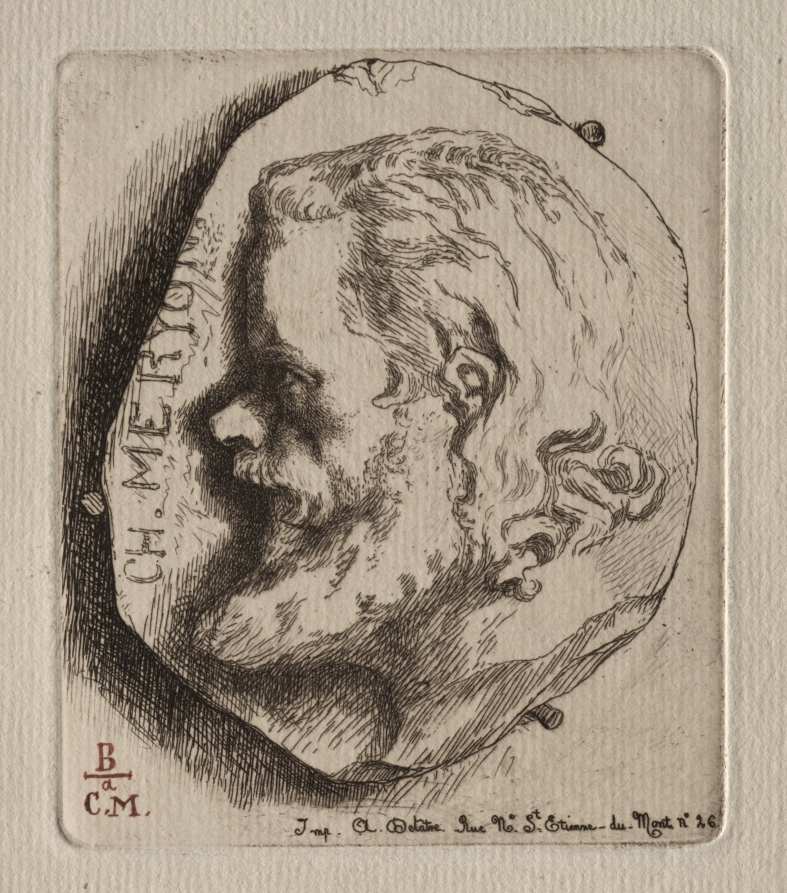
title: Charles Meryon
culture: France, 19th century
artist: Félix Bracquemond (French, 1833–1914)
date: 1854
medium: etching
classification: Print